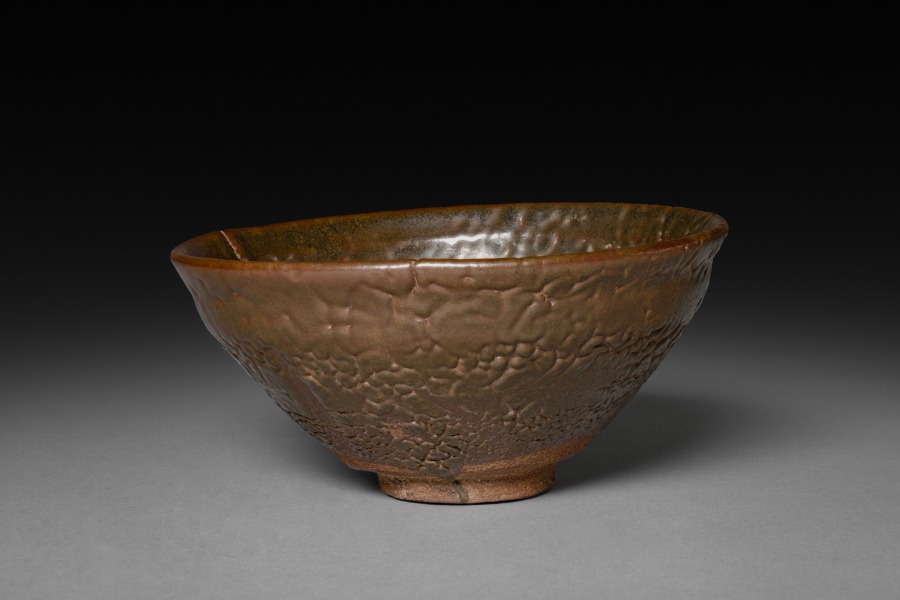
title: Tea Bowl: Jian ware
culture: China, near Shui ch'i, Song dynasty (960-1279)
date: 960–1279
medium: stoneware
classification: Ceramic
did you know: Jian ware was very popular with the tea cultures in China and Japan.